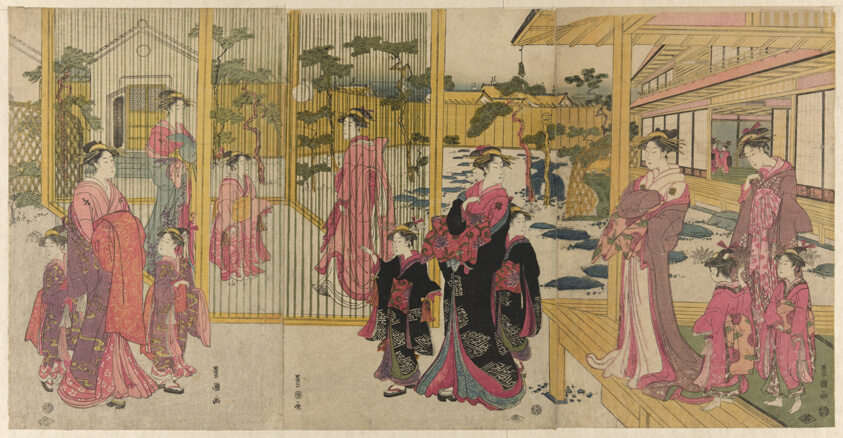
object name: Print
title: Courtesans of the Chojiya and their attendants playing kemari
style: Japanese (culture or style)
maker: Utagawa Toyokuni I 初代 歌川 豊国; Japanese, 1769–1825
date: c. 1791/93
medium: Color woodblock print; oban triptych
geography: Japan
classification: woodblock print; print; asian art